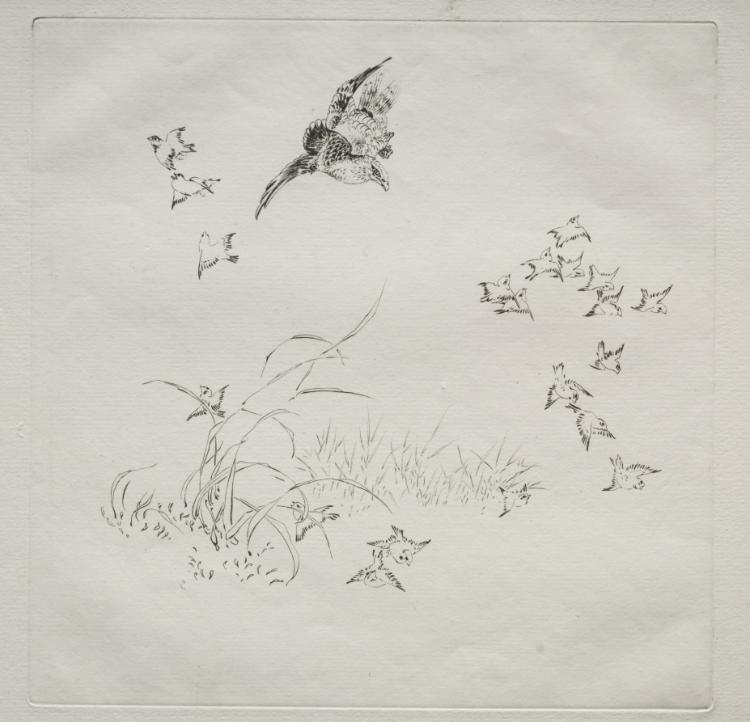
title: Parisian Service (Haviland service): The Terror (no. 4)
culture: France, 19th century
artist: Félix Bracquemond (French, 1833–1914)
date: 1875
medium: etching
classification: Print